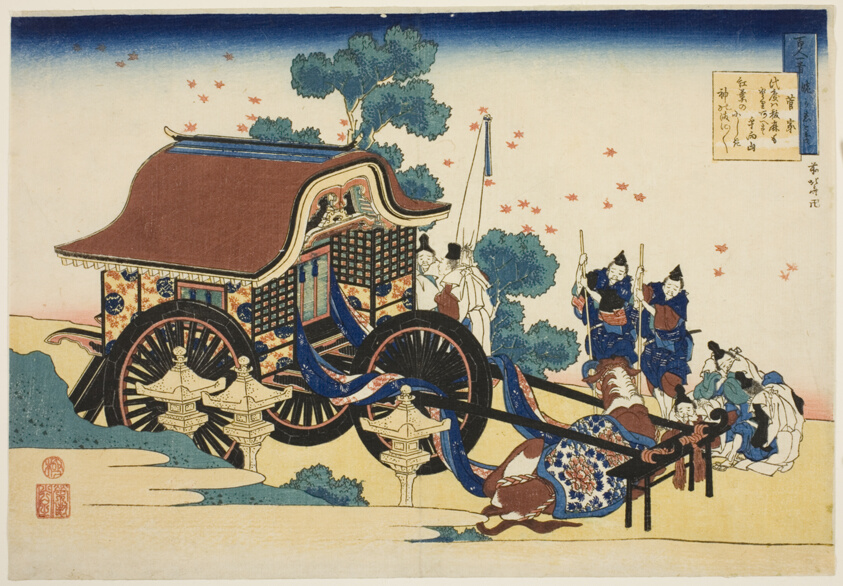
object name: Print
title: Poem by Kanke, from the series "One Hundred Poems Explained by the Nurse (Hyakunin isshu uba ga etoki)"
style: Japanese (culture or style)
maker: Katsushika Hokusai 葛飾 北斎; Japanese, 1760-1849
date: c. 1835/36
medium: Color woodblock print; oban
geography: Japan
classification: woodblock print; print; asian art